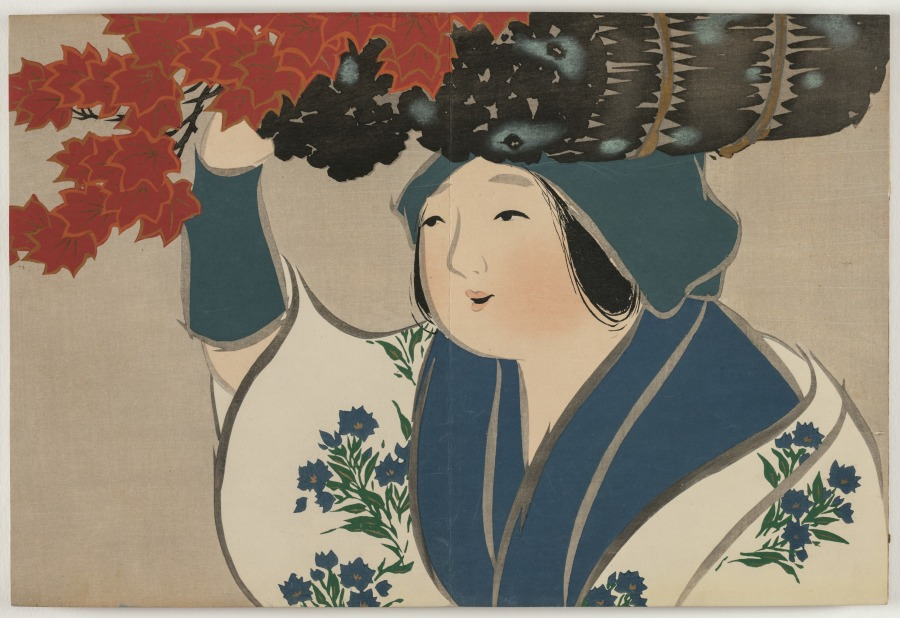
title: Flowers of a Hundred Worlds (Momoyogusa): Kindling Salesgirl (Kurokiuri)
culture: Japan, Meiji period (1868–1912)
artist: Kamisaka Sekka (Japanese, 1866–1942)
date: 1909–10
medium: color woodcuts with gold and silver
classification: Bound Volume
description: This print from a set of three woodblock printed albums displays the graphic design prowess of Kamisaka Sekka. The images were first distributed one by one to subscribers to the series but later were reissued in bound form, like this book, for mass consumers. Each print features a vignette taken from nature or Japanese literature. Many of the scenes have a long history in Japan, originating in the 900s or 1000s and having been interpreted by all manner of artists since that time. Sekka’s selections hew closely to precedents from the Rinpa style originated by painter Tawaraya Sōtatsu (c. 1570–c. 1640) and calligrapher Hon’ami Kōetsu (1558–1637).